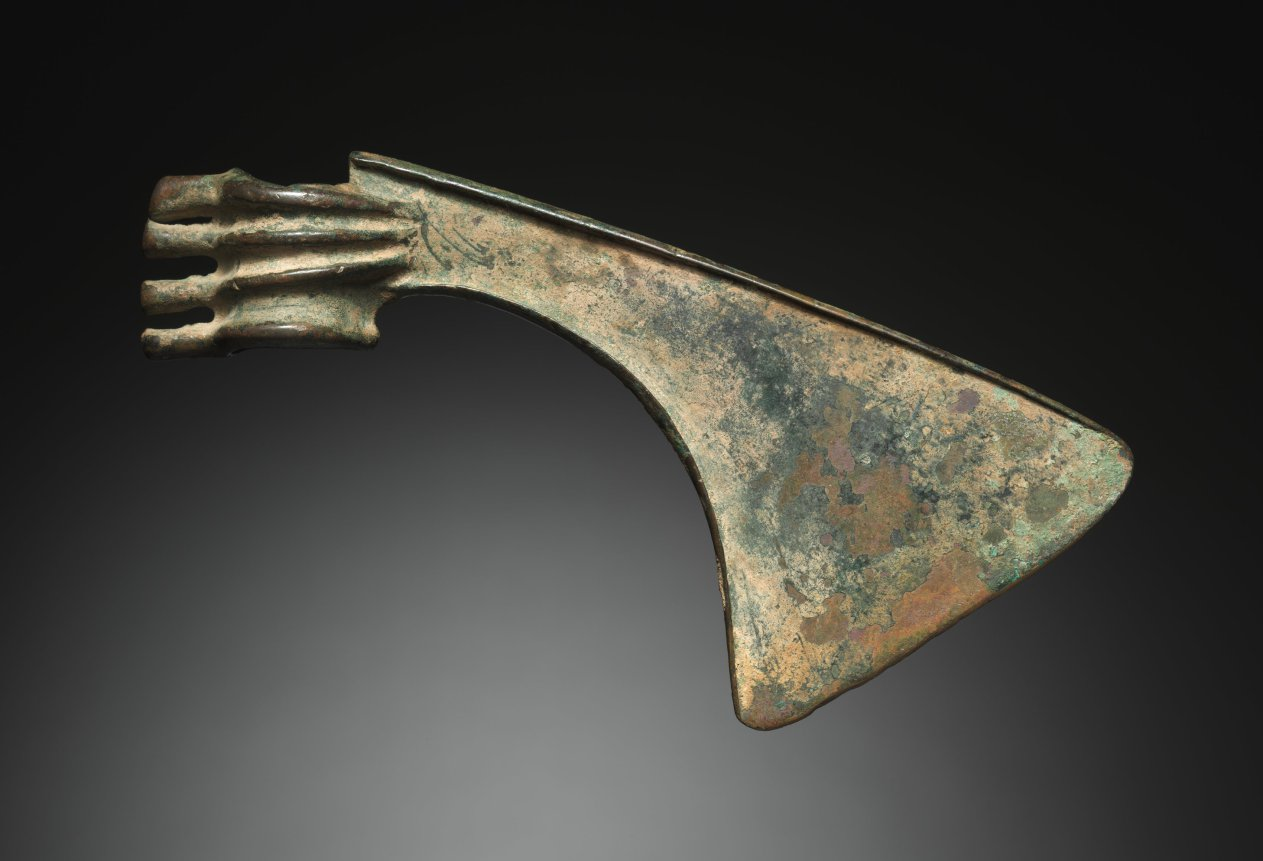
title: Axe-Head with Four Picks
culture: Iran, Luristan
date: 2000–1000 BCE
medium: bronze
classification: Metalwork